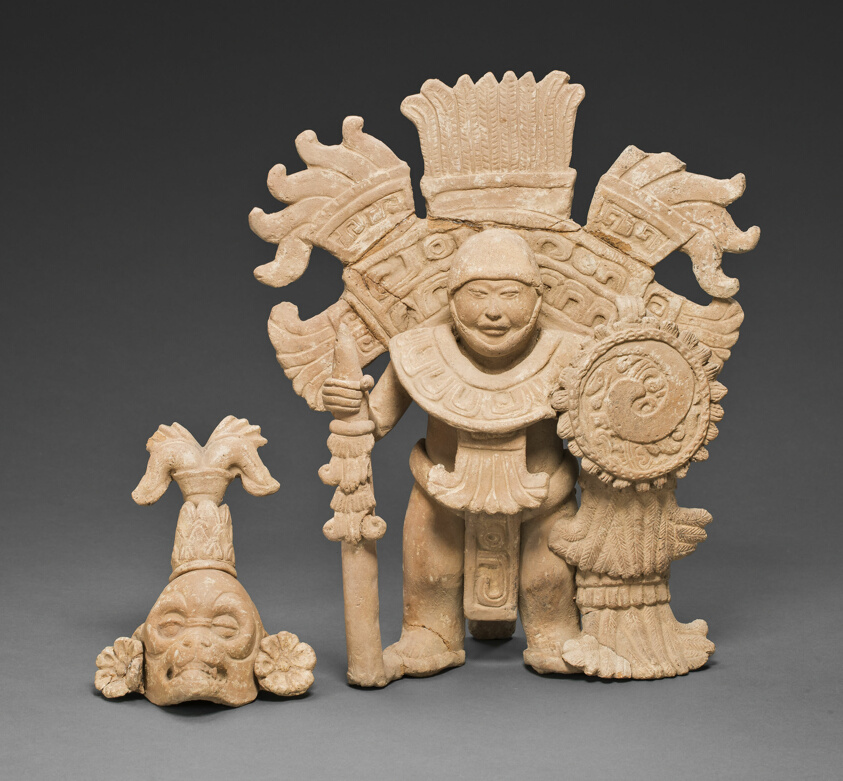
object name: Sculpture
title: Standing Warrior Figure with Removable Mask and Headdress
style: classic veracruz, Arts of the Americas, veracruz, mesoamerican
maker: Classic Veracruz; Veracruz, Mexico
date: 700–1000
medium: Ceramic and pigment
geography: Veracruz state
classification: sculpture; ceramics; masks; art of the americas; statue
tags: warriors, warefare, people